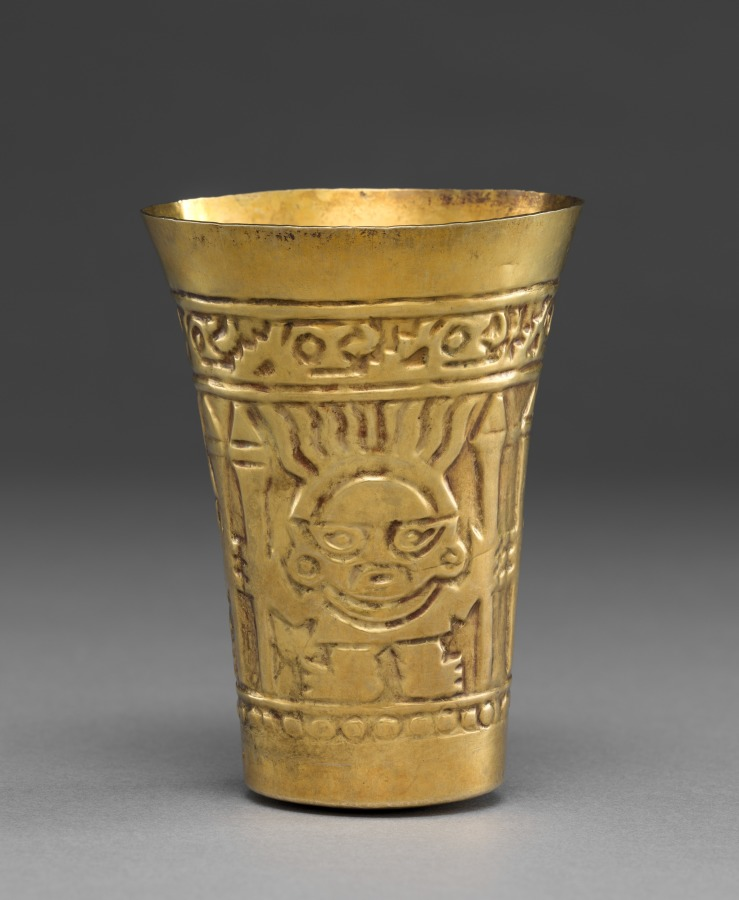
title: Beaker with Frontal Figures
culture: Central Andes (Peru), Lambayeque (Sicán) people, 10th century-12th century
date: 900–1100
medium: gold, hammered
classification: Metalwork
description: This beaker was created by an artist of the Lambayeque culture of Peru's north coast. It features a figure with comma-shaped eyes holding staffs, symbols of authority. If such beakers were used in life—that is, not created exclusively for the lavish tombs in which they have been found in quantities—they may have figured in feasting events that were central to late pre-Hispanic political, social, and religious life.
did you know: Gold beakers like this one were indicators of high status.